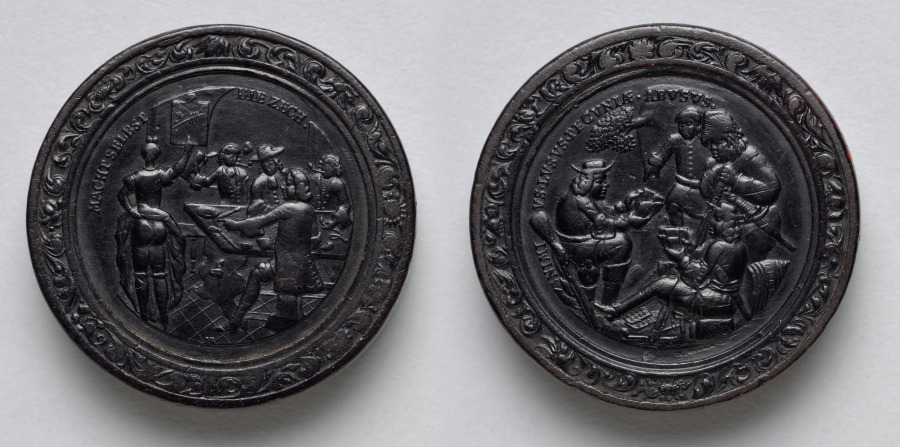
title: Gaming Piece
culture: Germany, late 17th-early 18th Century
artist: Martin Brunner (German, 1659–1725)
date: c.1700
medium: wood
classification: Furniture and woodwork